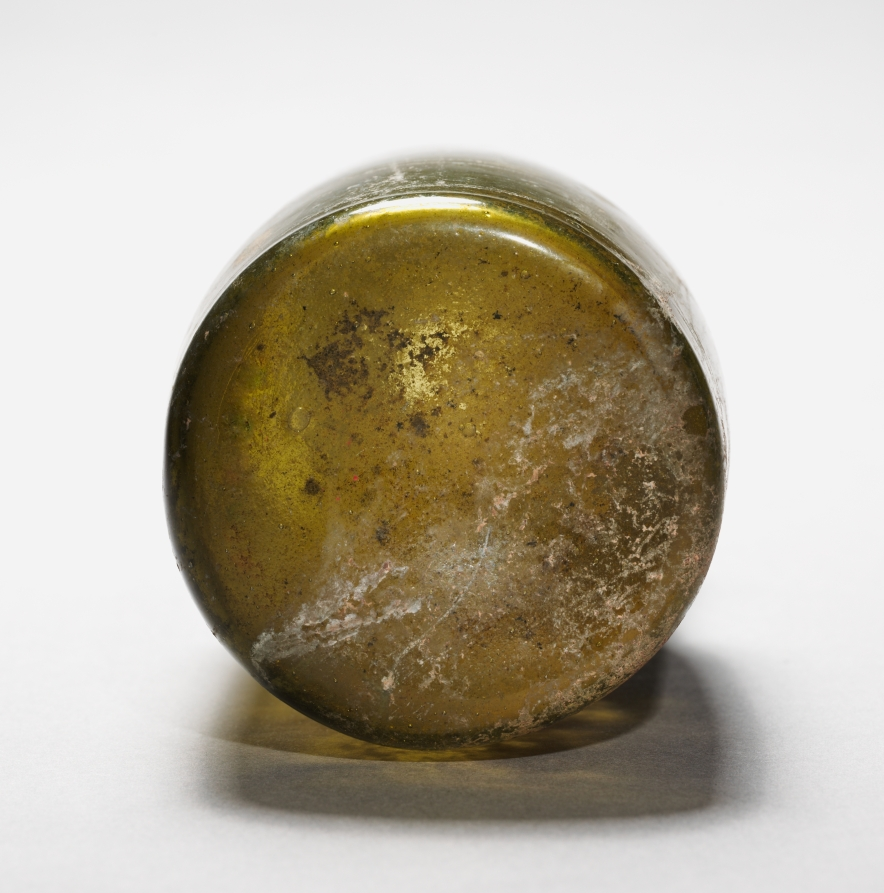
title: Pitcher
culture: Syro-Palestinian, Roman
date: 200–400 CE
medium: glass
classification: Glass